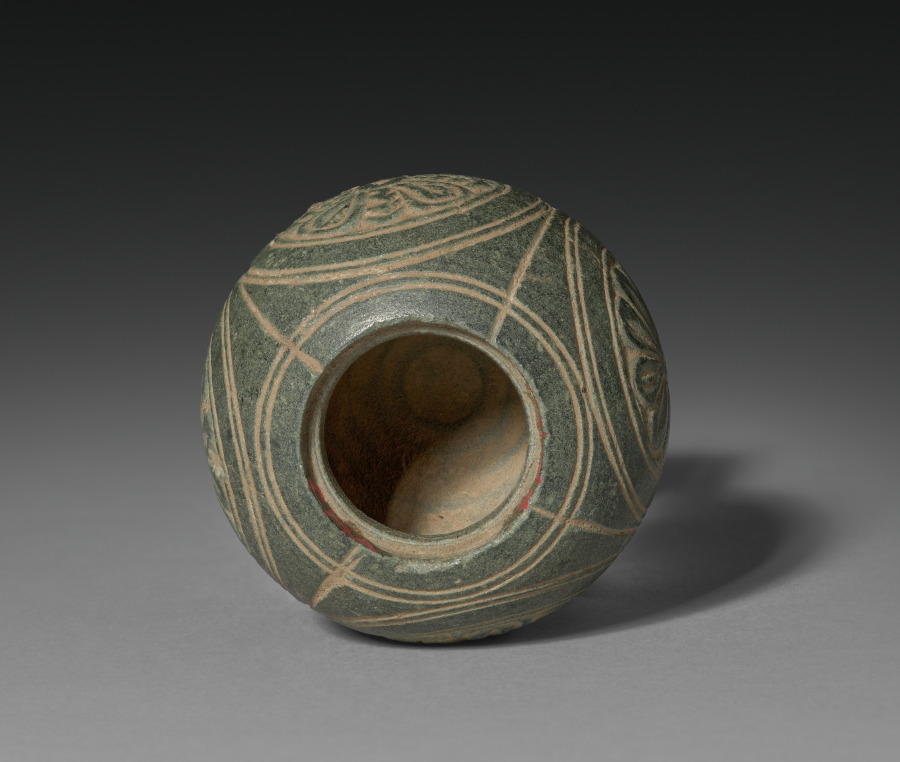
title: Miniature Stone Reliquary or Toilette Casket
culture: Pakistan, Gandhara, probably Sirkap, early Kushan period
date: 1–100 CE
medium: gray schist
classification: Sculpture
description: Tiny reliquaries holding the cremated remains of the Buddha or a high-ranking holy person empowered monuments and made them sacred. A Buddhist monument, such as the solid hemispherical mounds called stupas, would not be worshipped until it was consecrated with the relic secreted inside. Bits of ash were combined with tiny gems inside a crystal or glass reliquary, which was then placed inside a stone or metal container, like the lidded versions seen here. These containers look like cosmetic vessels for aromatic pastes used for perfume in ancient India. Buddhist texts state that the enlightened Buddha emitted a fragrance like sandalwood paste; the form of the reliquary as a perfume bottle indicates the presence of the Buddha by the visual reference to his pleasant scent. Once enclosed in the stupa the reliquaries would not be seen, but monks were tasked with applying sandalwood paste to the exterior of stupas as part of their regular maintenance to convey to visitors the ongoing presence of the Buddha radiating from the relic in the center.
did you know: The knob of the lid is gilded, as is the interior of the casket.